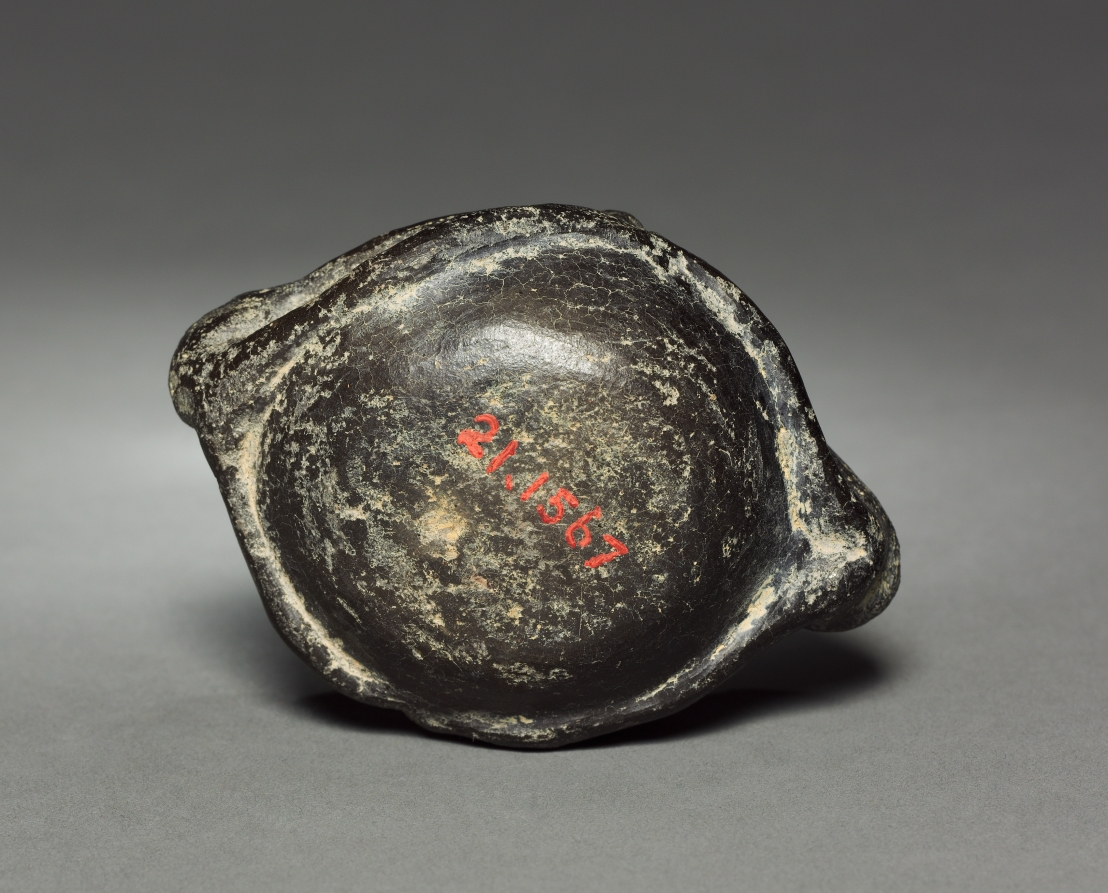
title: Jar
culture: Colombia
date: before 1921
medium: pottery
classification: Ceramic